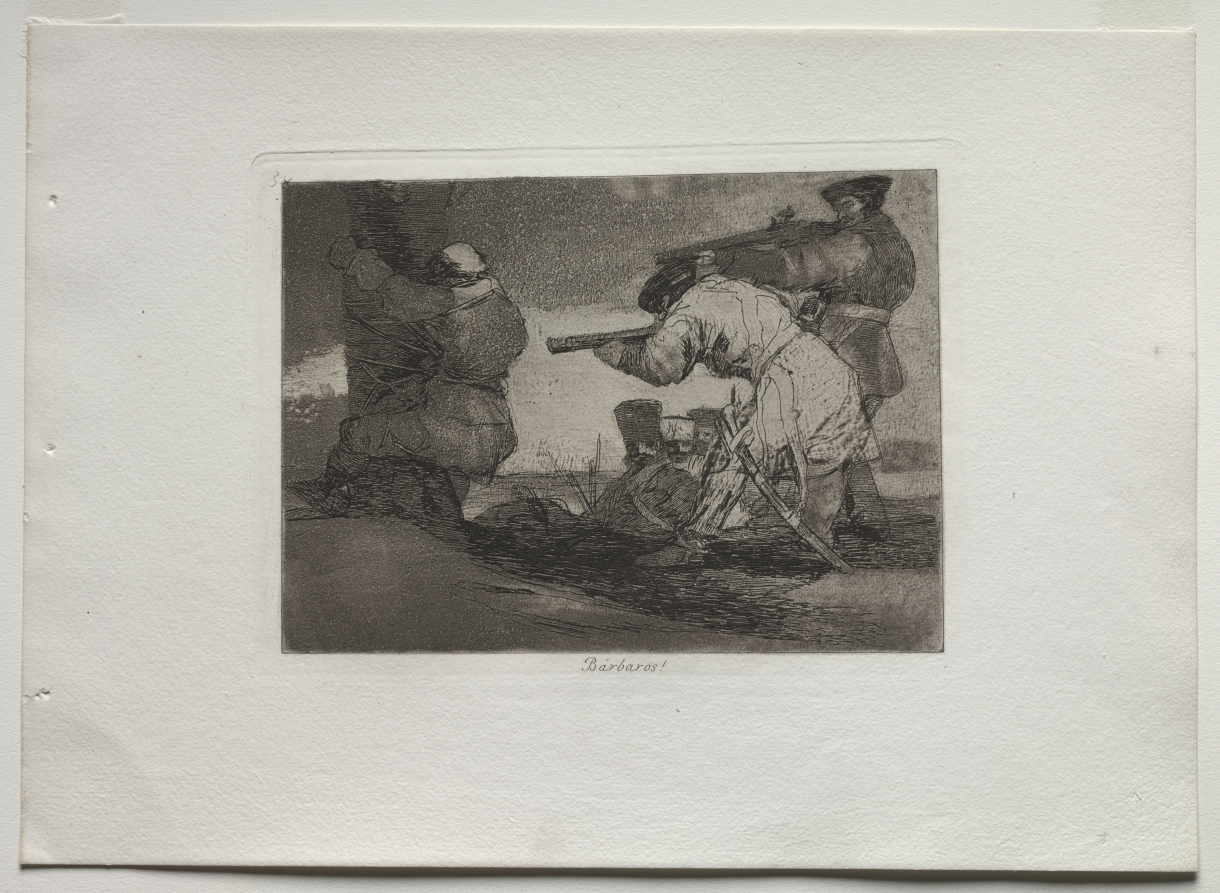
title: Disasters of War: Barbarians!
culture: Spain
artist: Francisco de Goya (Spanish, 1746–1828)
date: 1810–1820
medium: etching, aquatint, and engraving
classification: Print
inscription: title printed below the image; "#38" printed top left corner